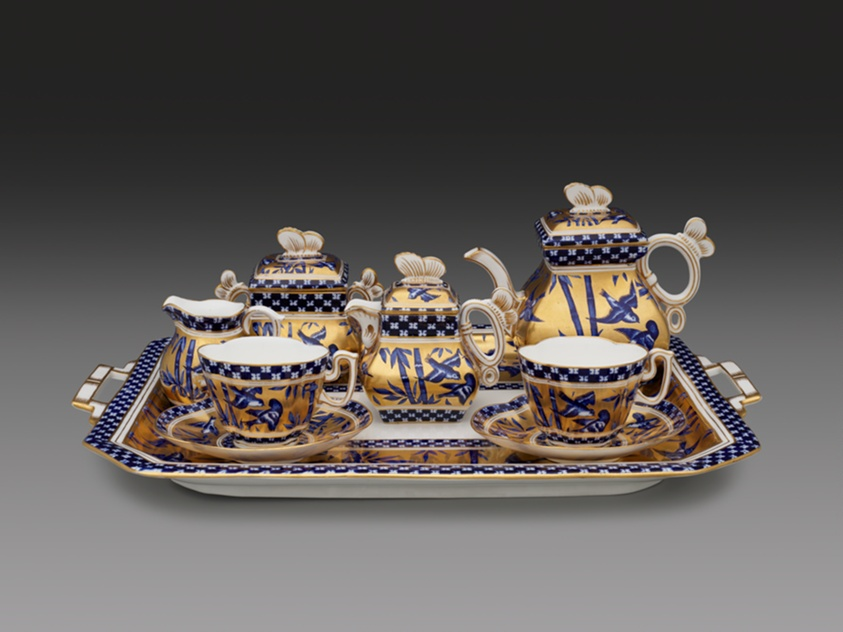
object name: Ceramics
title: Tea Service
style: Japanism, Aesthetic Movement, Aestheticism, japonism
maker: Designed by Thomas Blocksidge (English); Coalport Porcelain Factory (England, about 1799-1926)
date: c. 1885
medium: Bone china, enamel, and gilding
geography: Shropshire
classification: ceramics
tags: tea, tea service